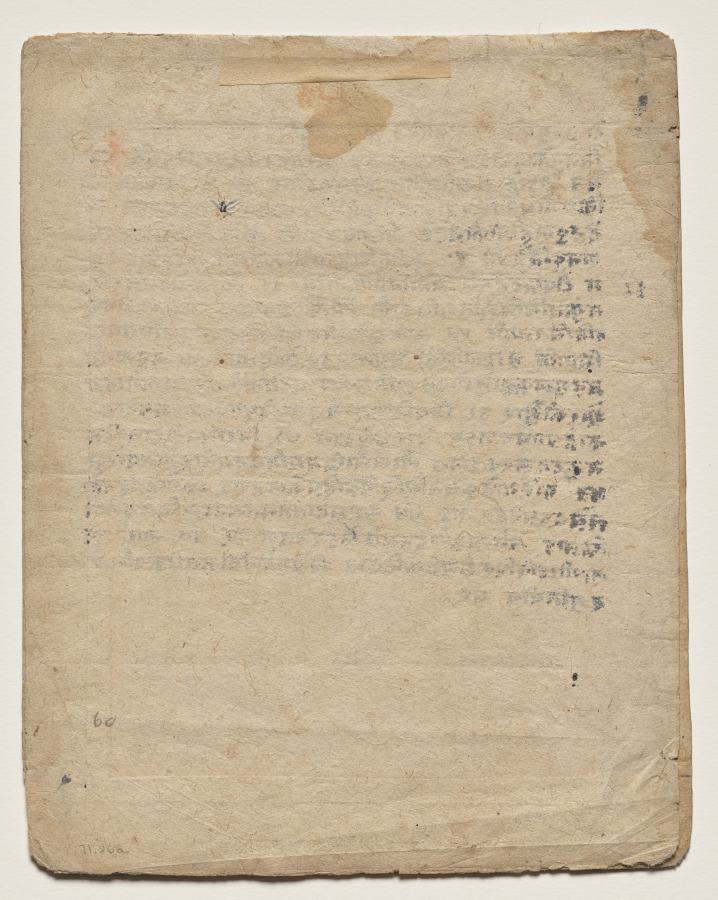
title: The lovelorn heroine, from a Sat Sai of Bihari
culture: Northern India, Pahari kingdoms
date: 1780–90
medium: Gum tempera and gold on paper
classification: Painting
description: The Sat Sai is a collection of poems mainly describing the beauty of women in a range of emotional states. The heroine of this poem sits against a tree that is in full flower, like her, but her lover is absent, and other girls walk by, gossiping. Not coincidentally, her dress matches the color of the blossoms, and no bees come to pollinate.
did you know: The Sat Sai was written for Raja Jai Singh I of Amber (r. 1625–67).